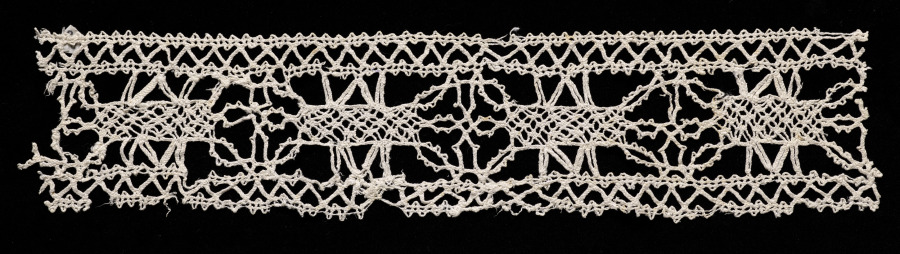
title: Lace Insertion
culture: Italy, Venice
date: 1540–60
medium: Bobbin lace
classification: Lace